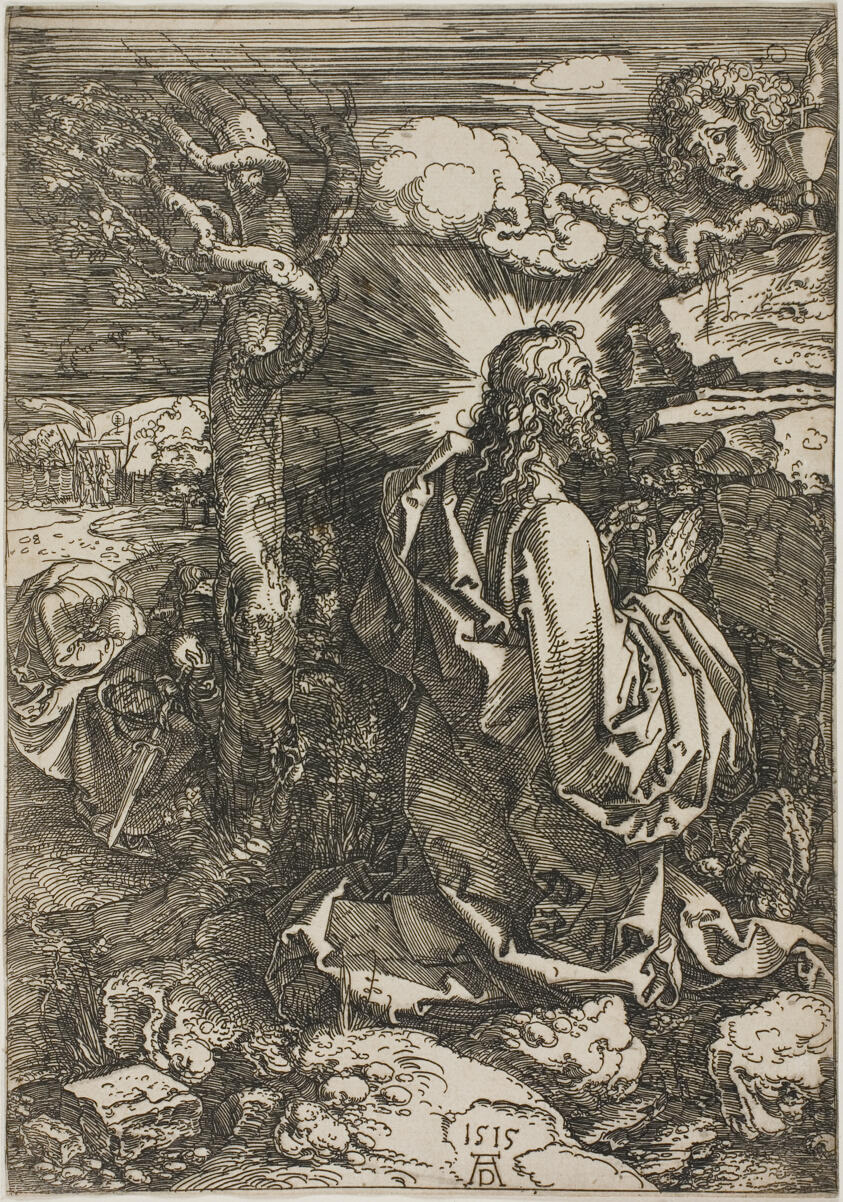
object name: Print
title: Agony in the Garden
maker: Albrecht Dürer (German, 1471-1528)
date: 1515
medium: Etching in black on ivory laid paper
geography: Germany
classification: etching; print; prints and drawing; paper